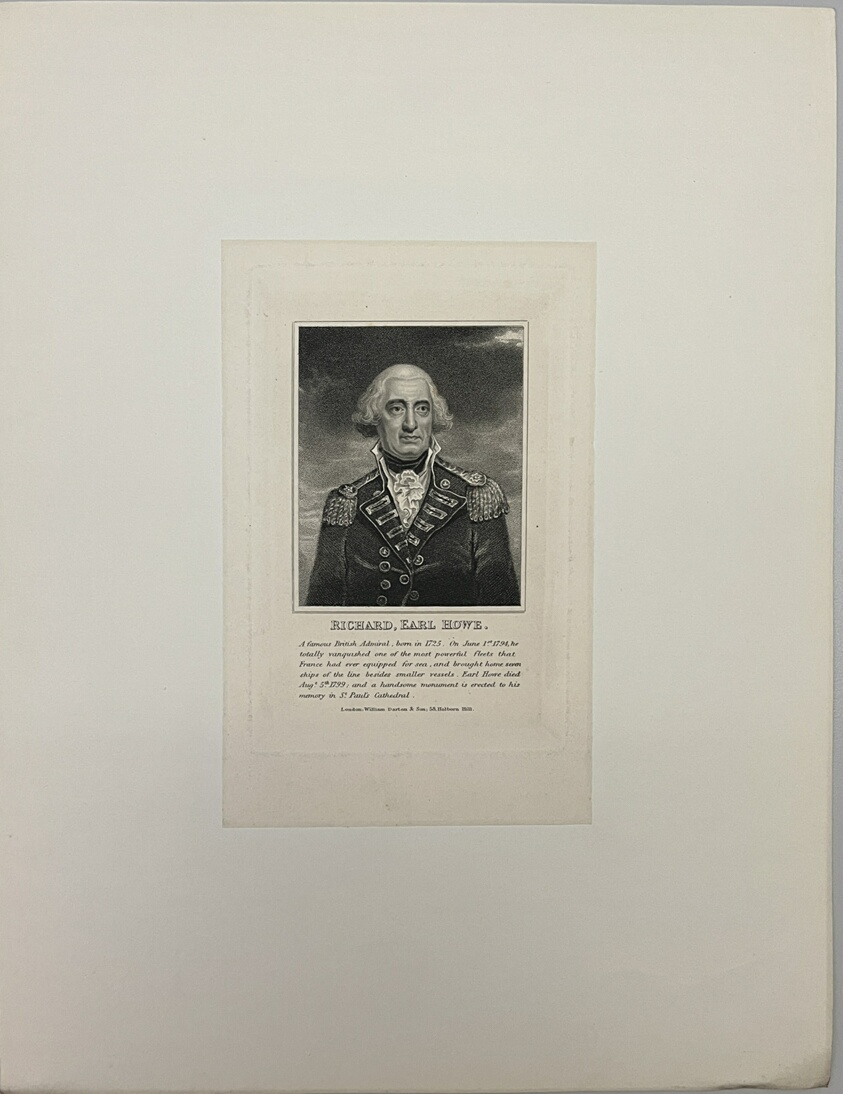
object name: Print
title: Richard, Earl Howe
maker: Artist Unknown (Likely British, 19th century); published by William Darton & Son (British, active 1800)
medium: Stipple engraving on paper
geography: United Kingdom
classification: reproduction; print; prints and drawing